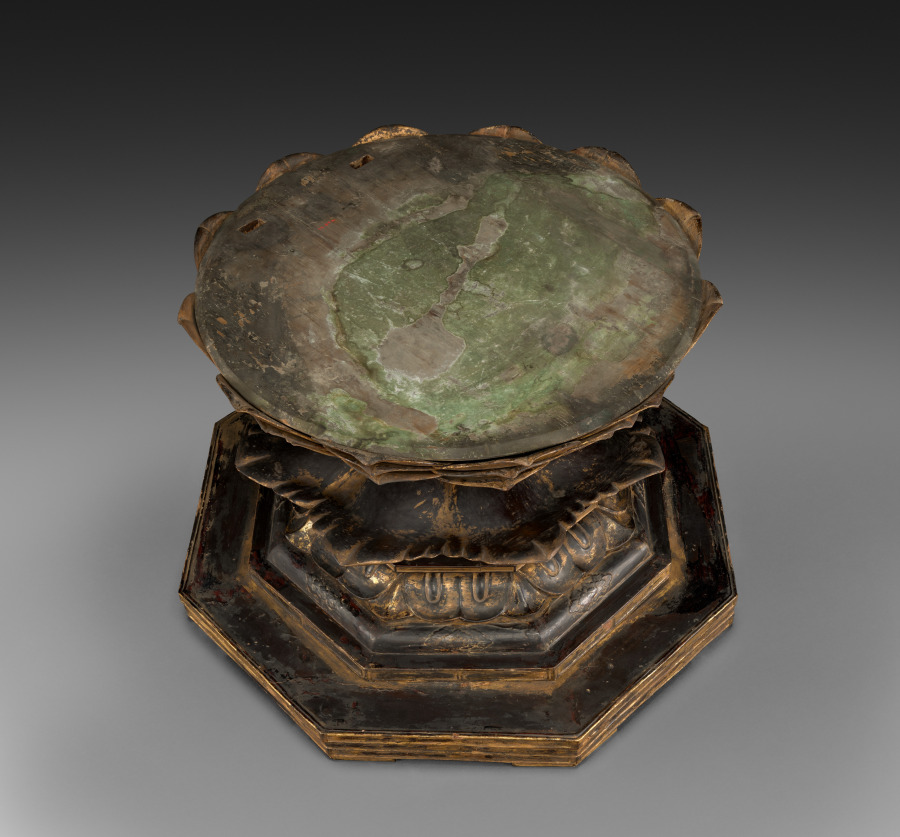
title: Seated Buddha (lotus pedestal)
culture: Japan, Heian period (794–1185)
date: 1100s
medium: gilded wood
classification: Sculpture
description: Composed of a number of hollowed-out pieces of wood that were then covered with lacquer and gilding, this sculpture would have served as the principal image of worship in a Buddhist temple hall. The Buddha Yakushi resides in the Lapis Lazuli Paradise of the East, and heals all diseases, including the ailment of ignorance. His left hand once held a medicine jar, while his right hand gestures reassurance. Seated on a lotus pedestal and backed by a mandorla and halo, the Buddha may have once been flanked by the bodhisattvas of the Sun and Moon, Nikkō and Gakkō, and protected by the Twelve Divine Generals, or Junishinshō.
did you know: This figure is depicted with a mudra, or hand gesture, that means "have no fear."